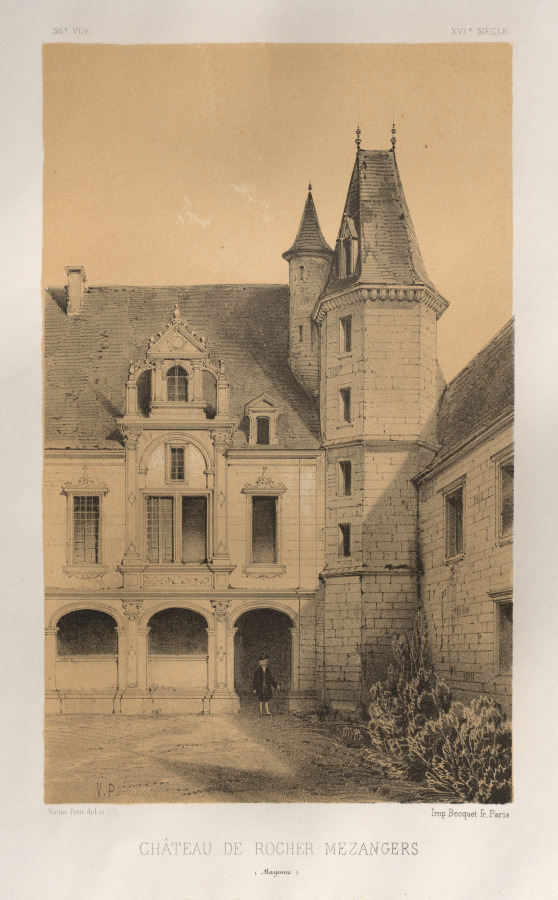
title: Architecture Pittoresque ou Monuments des xveme. Et xvieme. Siecles: Chateaux De France des XV et XVI Siecles: Pl. 36, Château De Rocher Mezangers (Mayenne)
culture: France, 19th century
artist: Victor Petit (French, 1817–1874)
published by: Charles Boivin (publisher and editor); Lith de Godard a Paris (printer)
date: 1860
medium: lithograph with tint stone, from portfolio of 100 lithographs with tint stone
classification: Print